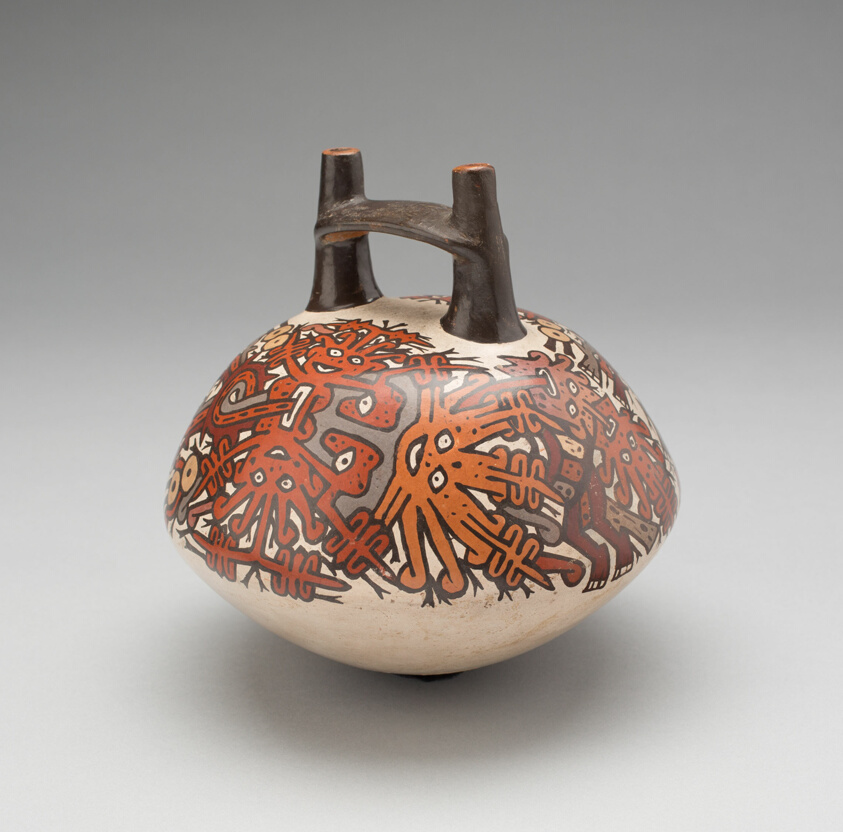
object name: Vessel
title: Double-Spouted Vessel Depicting Ritual Masks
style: nazca, early intermediate period, Pre-Columbian, americas, andes, Arts of the Americas, andean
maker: Nazca; South coast, Peru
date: 180 BCE–500 CE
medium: Ceramic and pigment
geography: Peru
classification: earthenware; art of the americas; ceramics; vessel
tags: abstract figures, ritual performer